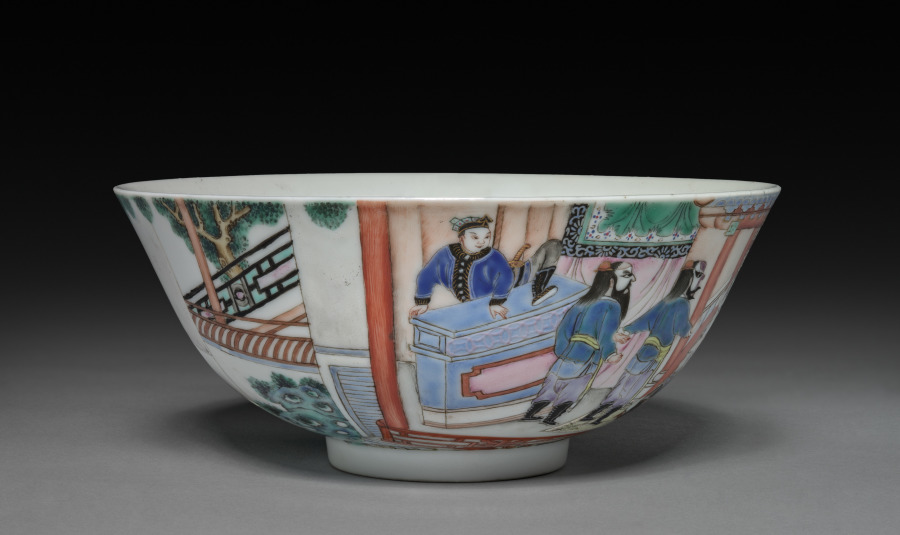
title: Five-color Bowl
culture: China, Qing dynasty (1644-1911), Daoguang reign (1821-1850)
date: 1821–1850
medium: porcelain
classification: Ceramic